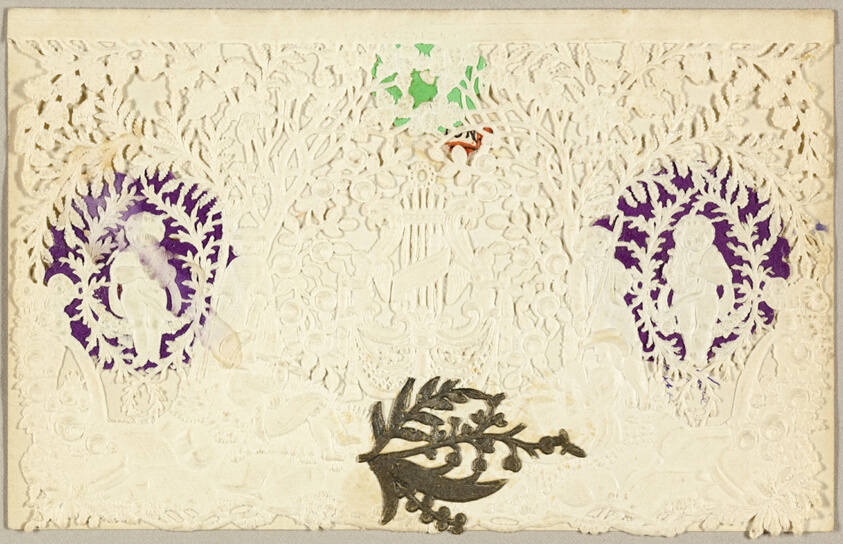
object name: Drawing and Watercolor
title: Untitled Valentine (Reclining Couple with Putti)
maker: Berlin and Jones (American, 19th century)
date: 1860/69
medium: Collaged elements on cut and embossed (designed) ivory wove paper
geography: United States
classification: collage; valentine; prints and drawing; paper